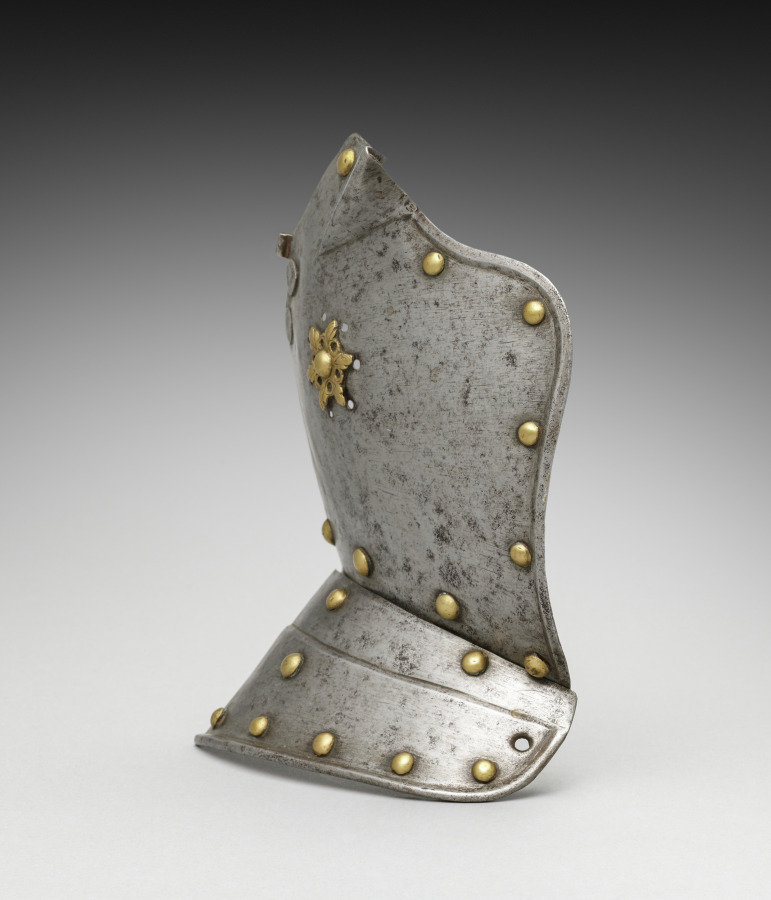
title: Ear Piece of a Helmet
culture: Germany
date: 1500s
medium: steel, brass headed rivets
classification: Arms and Armor